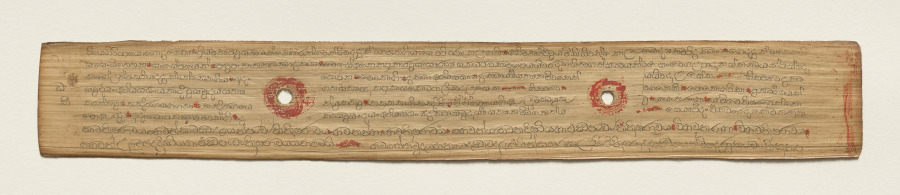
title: Leaf from a Buddhist Manuscript (recto)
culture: Sri Lanka, Singhalese, Late 17th century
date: c. 1700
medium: fiber paper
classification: Manuscript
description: Palm leaf material is still used for manuscripts in Sri Lanka. The palm leaves are prepared first by boiling them, drying them in the sun, and then rubbing them with oils. Scribes then use a metal stylus to incise the text. Then charcoal powder is wiped across the pages, filling in only the inscribed lines.